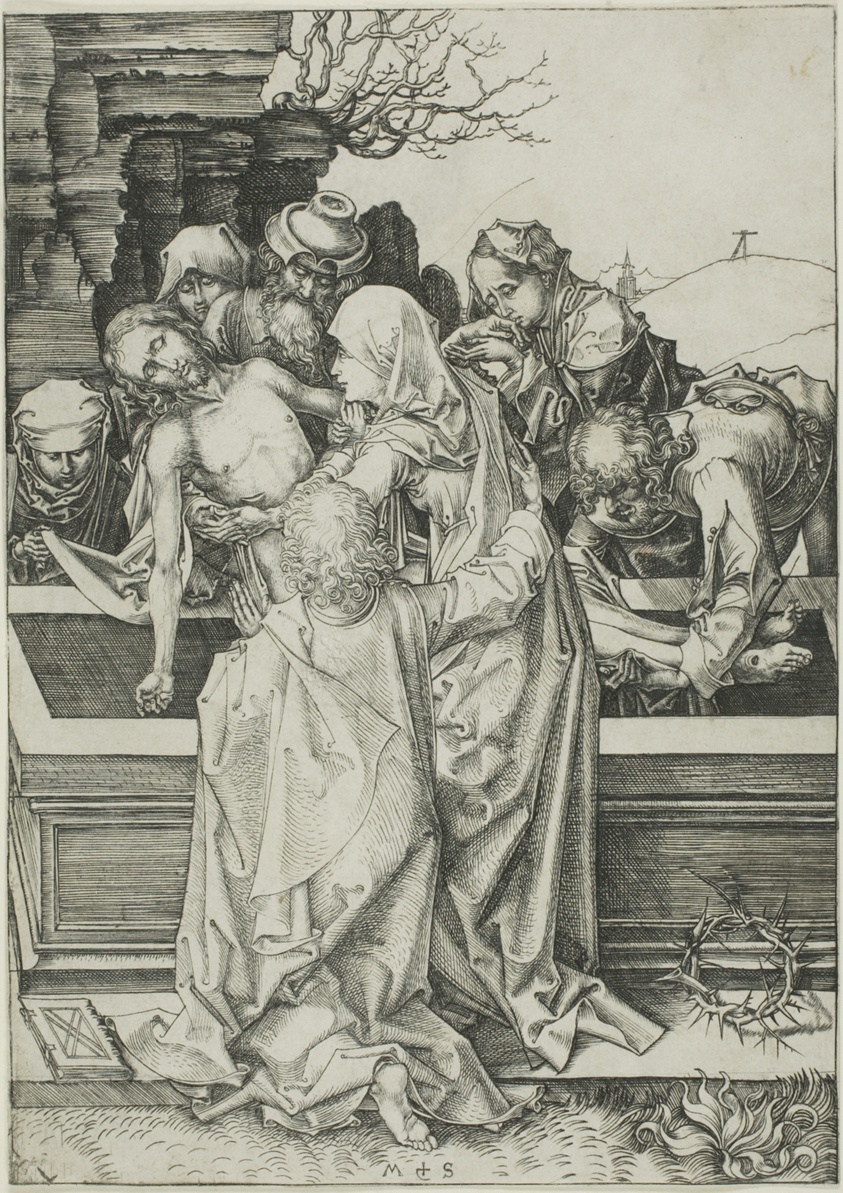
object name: Print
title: The Entombment, from The Passion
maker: Martin Schongauer (German, c. 1430/50-1491)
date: c. 1480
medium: Engraving on paper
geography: Germany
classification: engraving; print; prints and drawing